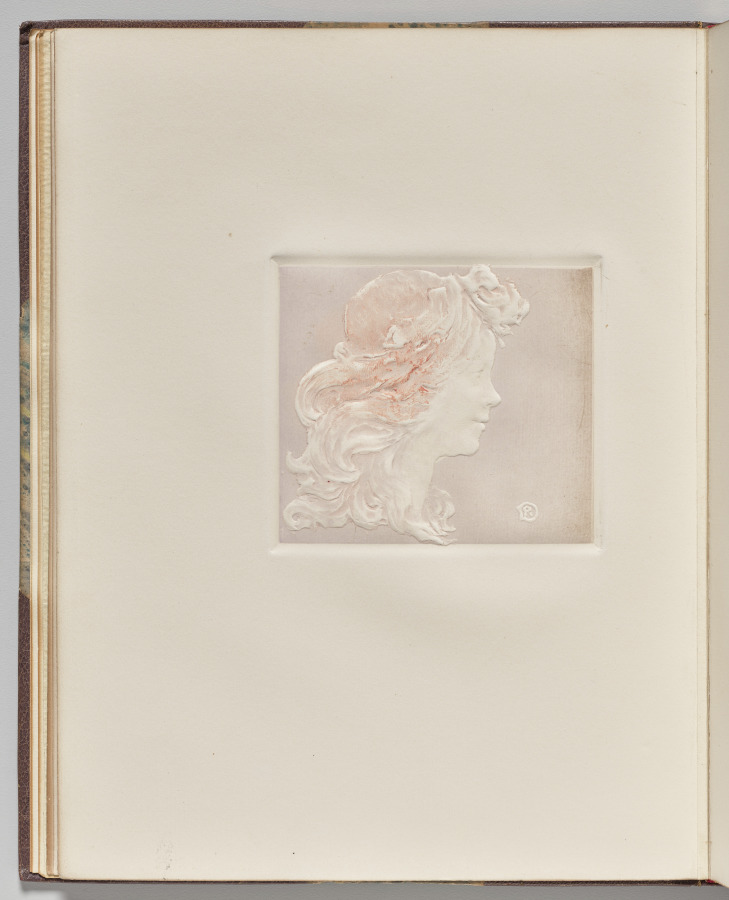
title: Profile of a Woman's Head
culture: France, early 20th Century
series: La Loïe Fuller, by Roger Marx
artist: Pierre Roche (French, 1855–1922)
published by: Les Cents Bibliophiles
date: 1904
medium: gypsograph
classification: Bound Volume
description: Although best known as a sculptor, Roche was a versatile and prolific artist who worked in many mediums. Loïe Fuller, the pioneer of modern dance who took Paris by storm in 1892, was one of his favorite subjects. He portrayed her in clay, bronze, marble, plaster, and in a series of gypsographs that illustrated an essay by the art critic Roger Marx. The book was described as "a precious monument to Loïe Fuller."